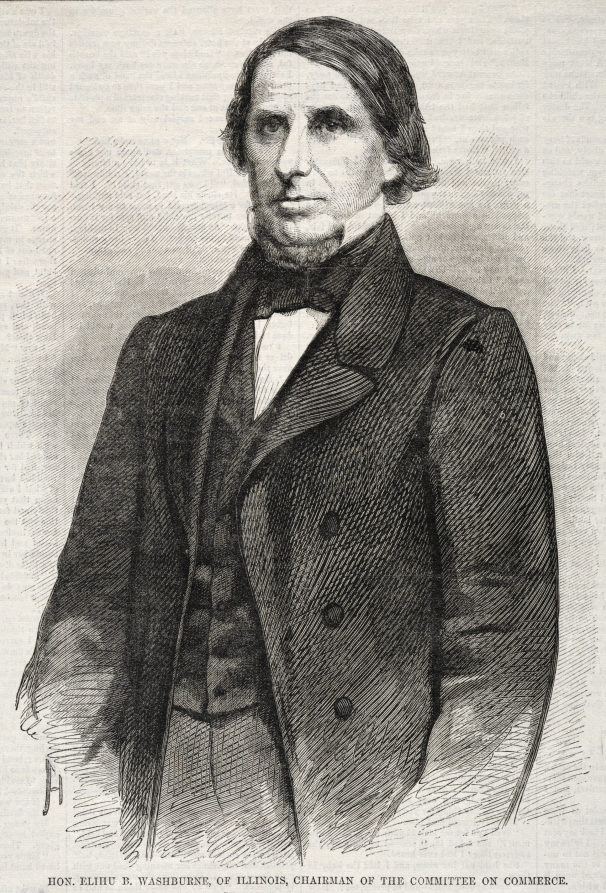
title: Hon. Elihu B. Washburne, of Illinois, Chairman of the Committee on Commerce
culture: America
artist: Winslow Homer (American, 1836–1910)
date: 1860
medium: wood engraving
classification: Print